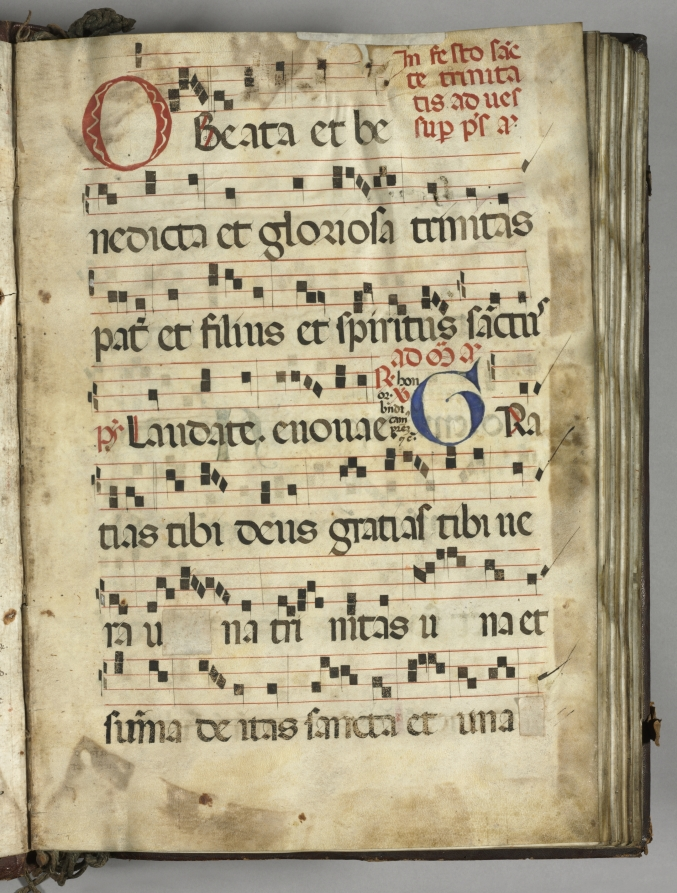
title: Choir Book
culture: Italy, 16th century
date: 1500s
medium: leather binding, copper alloy buckles, lead seal, parchment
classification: Manuscript